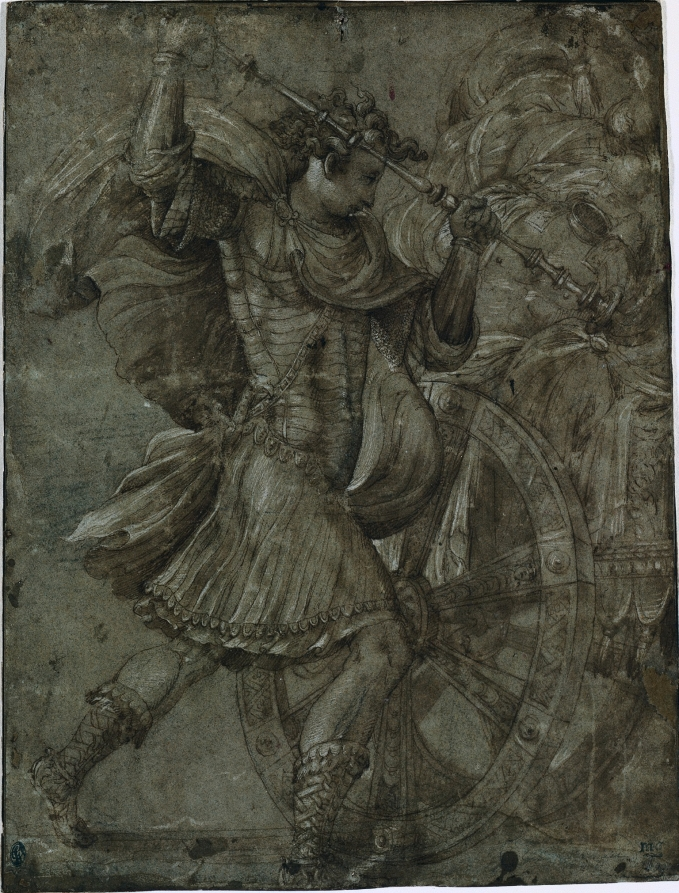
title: Man in Armor beside a Chariot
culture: Italy, 16th century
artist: assistant of Francesco Salviati (Italian, 1510–1563)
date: c. 1550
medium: pen and brown ink and brush and brown wash over black chalk, heightened with white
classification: Drawing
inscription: lower right, in graphite: [illegible] / Elève de Raphael [in parentheses] ; lower right, in graphite(?): [illegible] ; VERSO OF TERTIARY SUPPORT, upper left, in blue crayon: WCA 2302 ; center, in graphite: Maturino / Elève de Raphael [underlined, in parentheses) ; center right, in graphite: Ecole de Rome [in parentheses]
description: This drawing of a young soldier setting fire to a cart of war trophies may represent a rarely depicted legend about the Macedonian king Alexander the Great (356–323 BC), who built one of the largest empires of the ancient world by the time he was 30 years old. Because the heavy spoils of war were slowing down his troops, Alexander set fire to his own cart of goods to encourage his soldiers to do the same. Renaissance princes revered him as a brilliant military strategist. Emperor Maximilian I (reigned 1486–1519), pictured in the equestrian portrait and in the great triumphal car nearby, considered Alexander a distant ancestor.